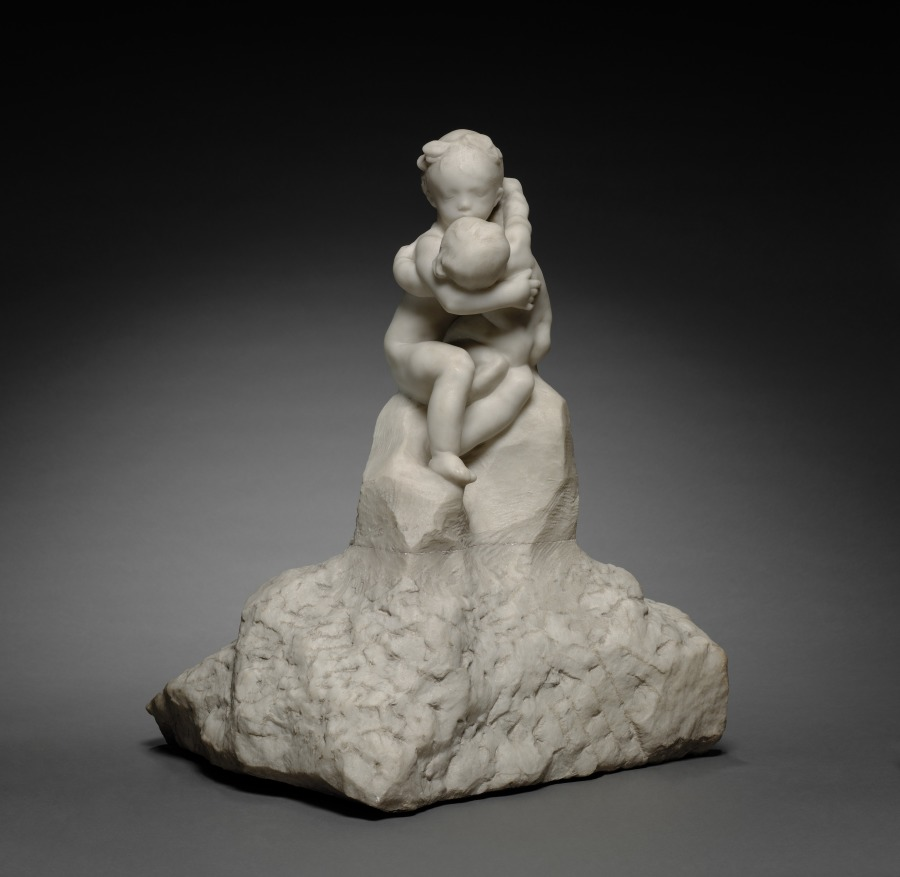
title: Little Brother and Sister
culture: France, early 20th Century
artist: Auguste Rodin (French, 1840–1917)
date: 1916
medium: marble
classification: Sculpture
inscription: Signed on base beneath figures: "A. Rodin"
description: Rodin spent years exploring new ways of representing the human emotions of love and affection experienced at different stages of life. The bodies and gestures of the children here suggest an innocent foreshadowing of the mature couple in the artist’s celebrated sculpture The Kiss of 1882. Both works feature a strong tactile contrast between the rough-hewn lower area and the smooth surfaces of the nude body above. Upwardly spiraling forms, combined with shifting areas of light and shadow, infuse the sculpture with dynamic energy.